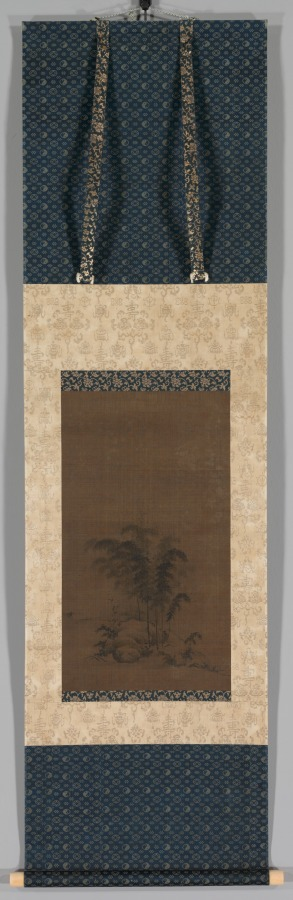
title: Bamboo Landscape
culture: China, Southern Song dynasty (1127–1279)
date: 1127–1279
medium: hanging scroll; ink on silk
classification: Painting